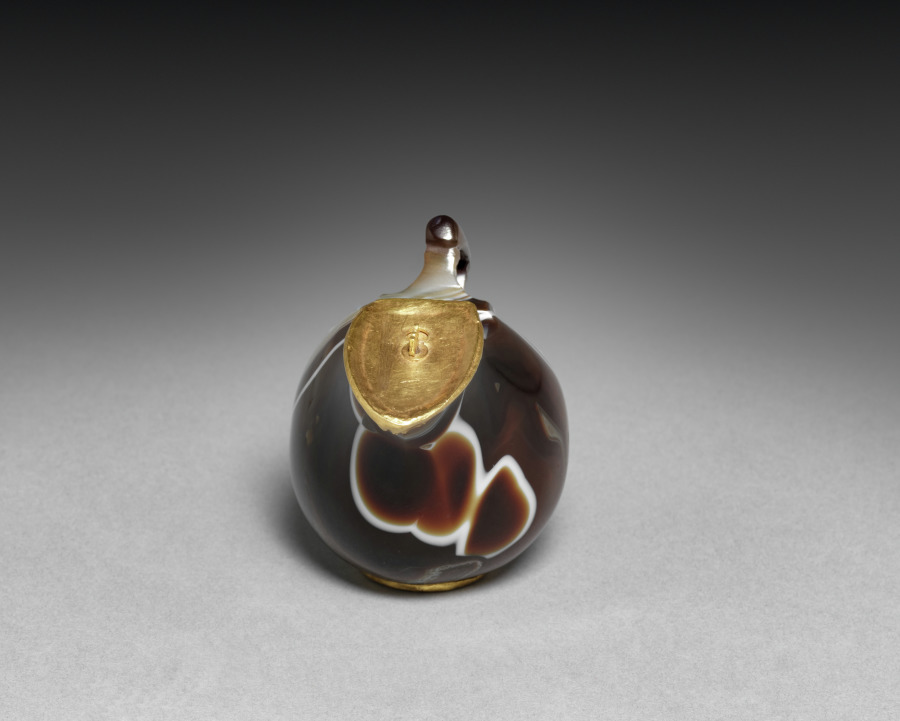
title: Askos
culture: Greece, Ptolemaic Dynasty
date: 200–1 BCE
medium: agate and gold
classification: Cosmetic Objects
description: This miniature vessel was carved from a single piece of banded agate, polished to a shine, and embellished with a gold lid and gold details on the base. Inside the ring of gold at the base is a trio of gold papyrus stalks, a likely reference to Egypt. In shape, it resembles an ancient wineskin, or askos, though its small size suggests use for luxury perfumes or oils. A tiny crab, likely once inlaid with a precious material, has been carved behind the handle.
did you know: The knob on the lid connects to a hidden disk to control the flow of liquid.